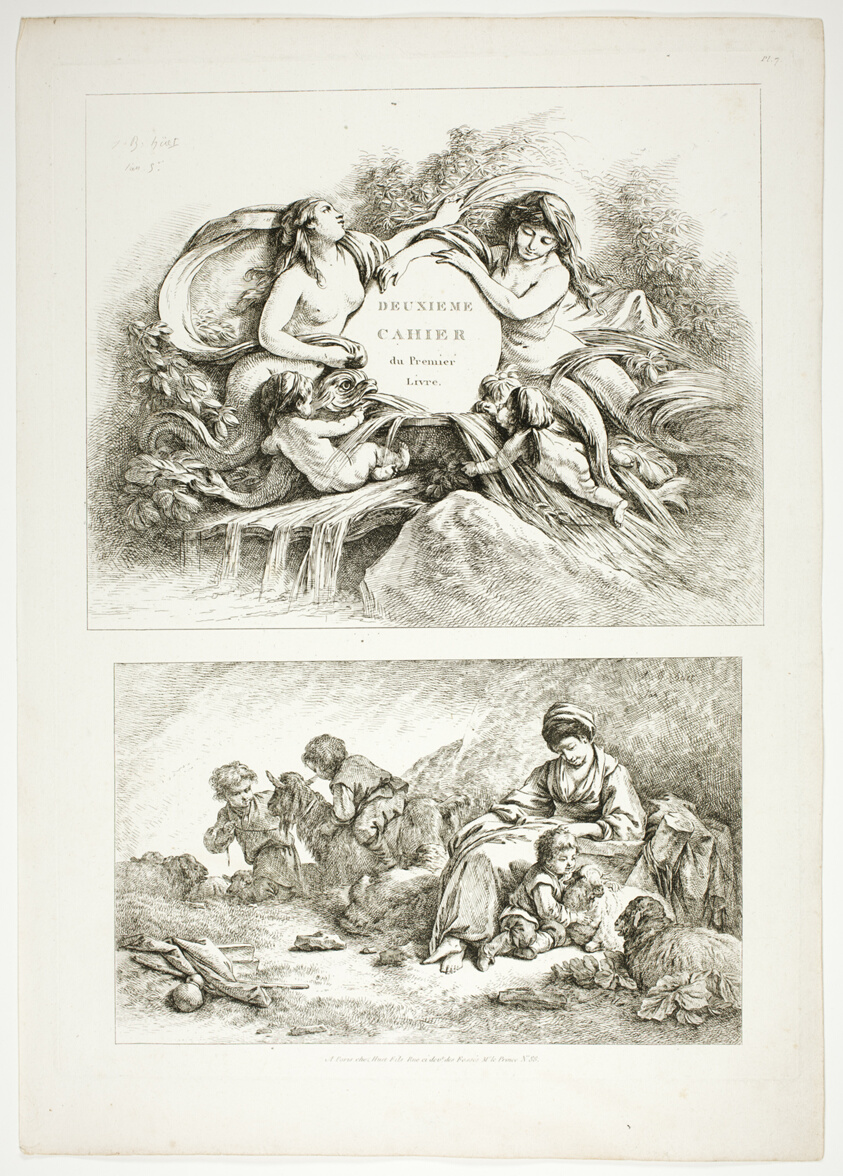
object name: Print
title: Plate Seven of 38, from Oeuvres de J. B. Huet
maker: Jean Baptiste Huet (French, 1745-1811)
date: 1796–99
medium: Etching on paper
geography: France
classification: etching; print; prints and drawing